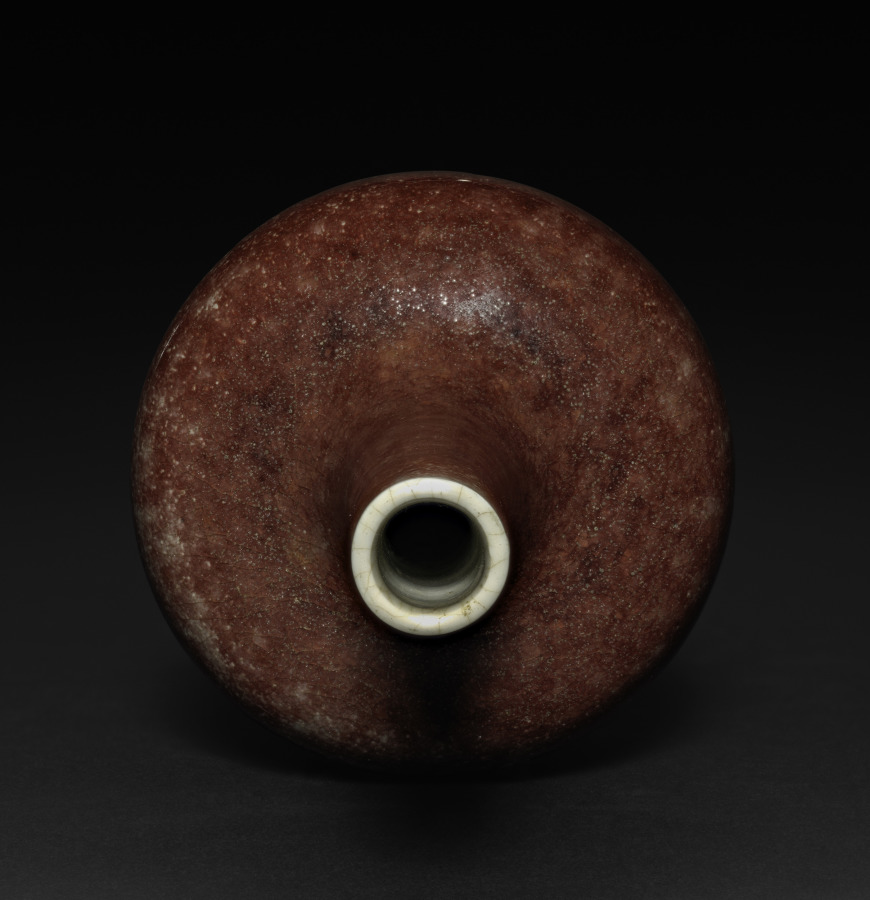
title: Bottle Vase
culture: China, Jingdezhen, Jiangxi province, Qing dynasty (1644–1911), Kangxi reign (1662–1722)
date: 1662–1722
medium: porcelain, Lang ware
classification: Ceramic